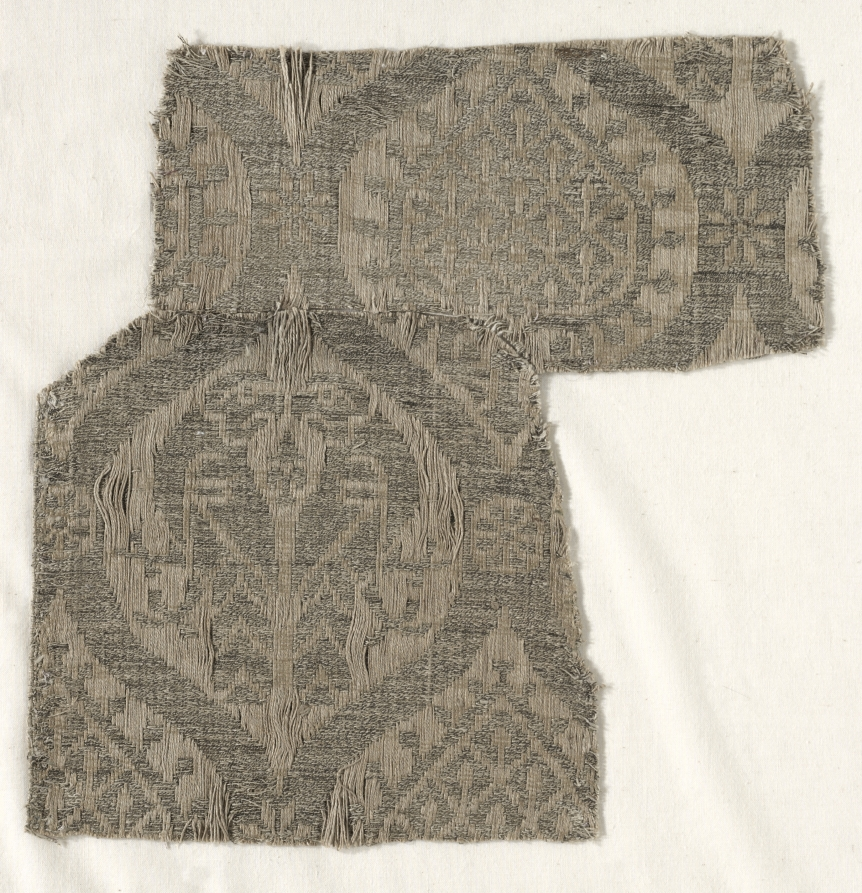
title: Textile Fragments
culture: Spain, Mudejar, 13th century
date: 13th century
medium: compound twill, silk and gold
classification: Textile